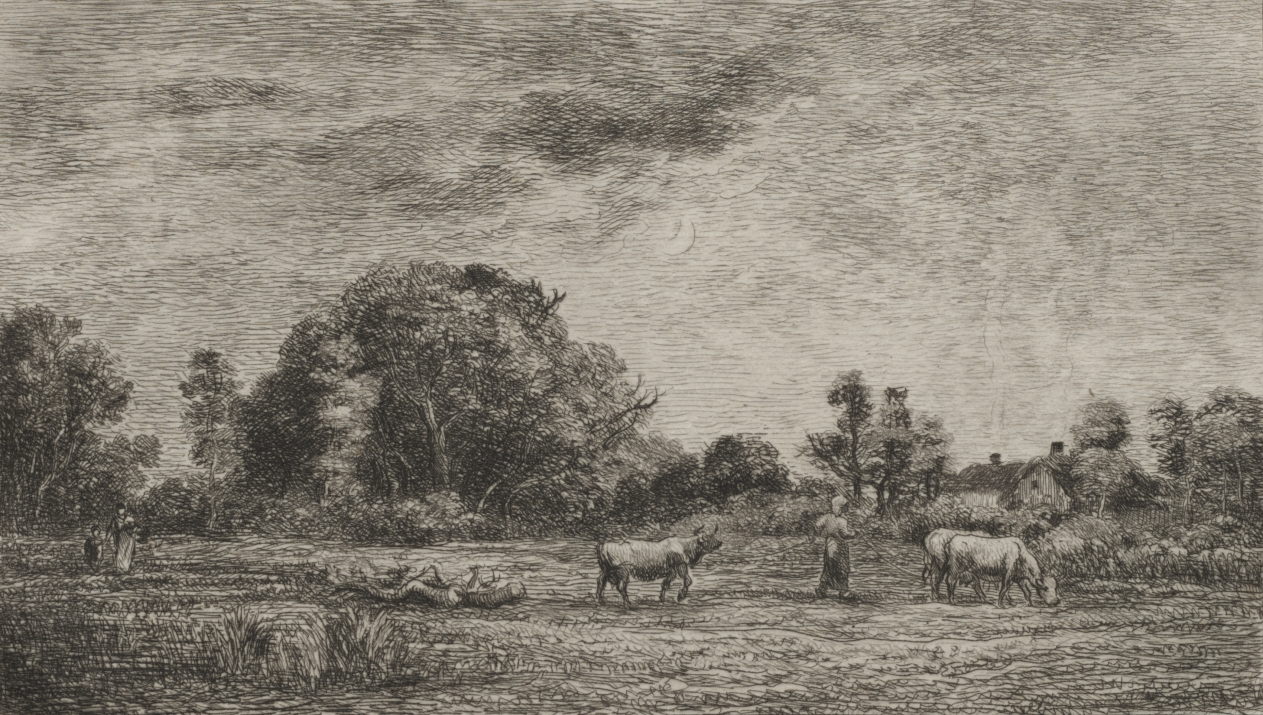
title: Moonrise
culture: France, 19th century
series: Published in the "Gazette des Beaux-Arts" in 1861.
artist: Charles François Daubigny (French, 1817–1878)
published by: Auguste Delâtre (5th state); A. Salmon (6th state)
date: 1861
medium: etching and drypoint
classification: Print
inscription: signed, lower left, in plate: Daubigny